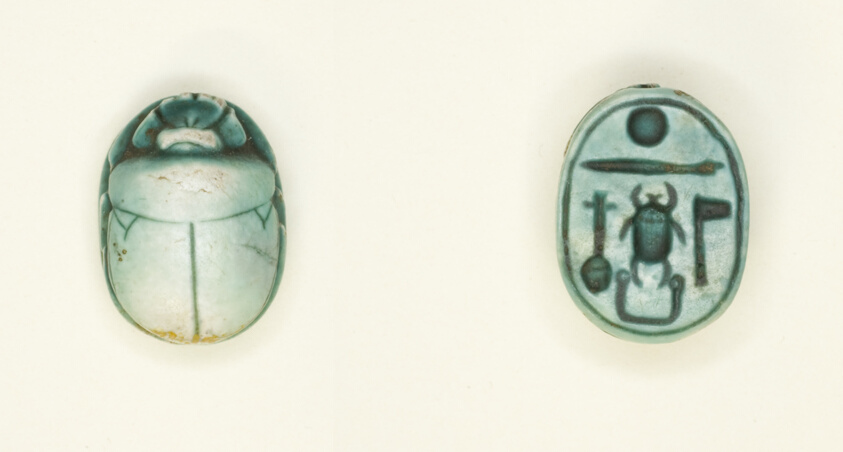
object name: Costume and Accessories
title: Scarab: Aakheperkara (Thutmose I)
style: new kingdom, eighteenth dynasty, egyptian, ancient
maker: Egyptian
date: New Kingdom, Dynasty 18, Reign of Thutmose I (about 1504–1492 BCE)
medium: Glazed steatite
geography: Egypt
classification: scarab; ancient art; costume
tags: Hieroglyphs, insects, king